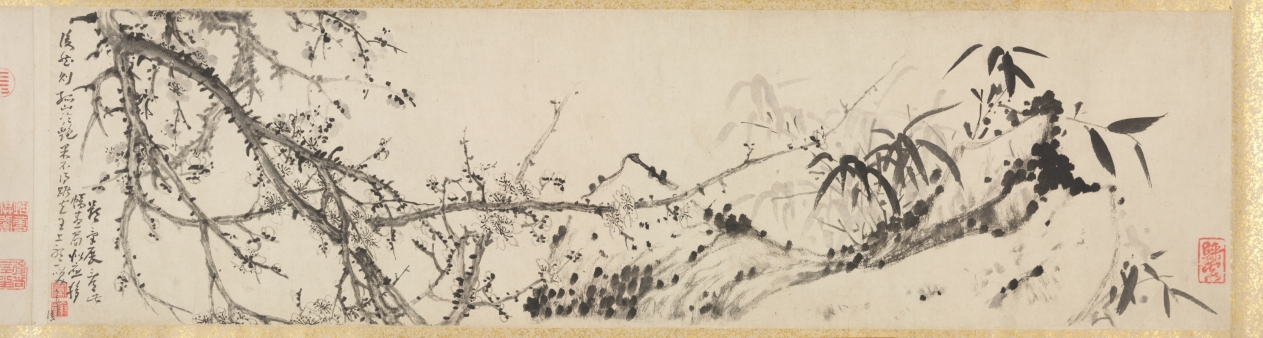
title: Plum Blossoms and Peonies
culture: China, Qing dynasty (1644-1911)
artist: Gao Fenghan (Chinese, 1683–1749)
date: 1741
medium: handscroll, ink on paper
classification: Painting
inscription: Artist's 2 inscriptions and 9 seals (the painting of Peonies with the artist's colophon and the colophon by Hou Chia-fan are on a single sheet of paper). Artist's inscription and 2 seals (Plum Blossoms): [seal] Ts'ai-yün. After finishing writing my colophon, I unrolled the painting to take another look, and it now seems that the composition here should have moved to the later part of the scroll. If that is the case, then the "Cool Beauty" [prunus] of the Solitary Hill is after all unable to take precedence over the "King of Flowers" [peony]. A laugh. Lao-fou inscribed. [seal] Feng-han. Artist's colophon (Plum Blossoms): [3 seals] Tun; Yen-yün-kung-yang, Hou-shang-tso-sheng. A few days after I painted this scroll for Shui- hsien [Yüeh Meng-yüan], the plum blossoms were in full bloom at his residence. He invited me over to enjoy them together for a long while, and I composed two additional poems and wrote them down here for his criticism. [Poems on the colophon are not translated.] First month, twenty-first day, your junior, Kao Feng-han of Nan-fou drafted this with the left hand. [seal] Feng-han. Artist's inscription and 4 seals (Peonies): Brushed with the left hand in the hsin-yu year [1741]. [seal] Yu-hsi. [3 seals at end of painting] Hou-shang-tso-sheng; Yen-yün-kung-yang; Shih-tsao-wu. Artist's colophon and seal (Peonies): The imperial concubine from the Yang family loved to dress in red, And from the emperor won the title of Hai-t'ang. But ever since she became the new dream of the moon palace, She changed into rainbow colors, while learning to dance. After I wrote the poem on Looking for Plum Blossoms in the Teng-wei Mountains, I attached to it a few branches of prunus, some bamboo tips and a piece of rock, with a scattering of green [moss] here and there to fill up the scroll. Unexpectedly, my playful fascination [with these subjects] was still not quite satisfied, so I made up these amorous ideas and romantic images [of the peony], to follow the footsteps of the fair lady of the Ku-hsieh Mountain [prunus]. Furthermore, I picked out one poem to be my vanguard. Perhaps such luminosity of wealth and power will be enough to overwhelm the poor fellows, and [they] will not mind the comparatively short length [of paper] assigned to it. Amusingly inscribed. Please correct me again. To Shui-hsien, my learned senior, your junior Han inscribed again. [seal] Tso-hua [left-handed painting]. 1 additional colophon and 5 additional seals: 1 colophon, dated 1742, and 3 seals of Hou Chia-fan (act. ca. 1742); 1 seal of P'u Ch'üan (20th c.?); 1 seal of Li family (dates unknown).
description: One of the so-called Yangzhou Eccentrics (a group of painters who lived in Yangzhou and were known for their unorthodox art and lifestyle), Gao Fenghan depicts China’s two most loved flowers in full bloom—the “cold beauty,” or plum blossom, in the first section, and the “king of flowers,” or peony, in the second section. Painted in 1741, the year when Gao decided to leave the south and return home to Shandong province in eastern China, this work was likely a token of farewell. His casual brushwork may indicate his mental and physical struggle at the time. After having crippled his right hand in 1737, Gao used his left hand to paint and achieved a crudeness and eccentric style unattainable before.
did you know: In East Asian art, peonies traditionally symbolize prosperity and wealth.